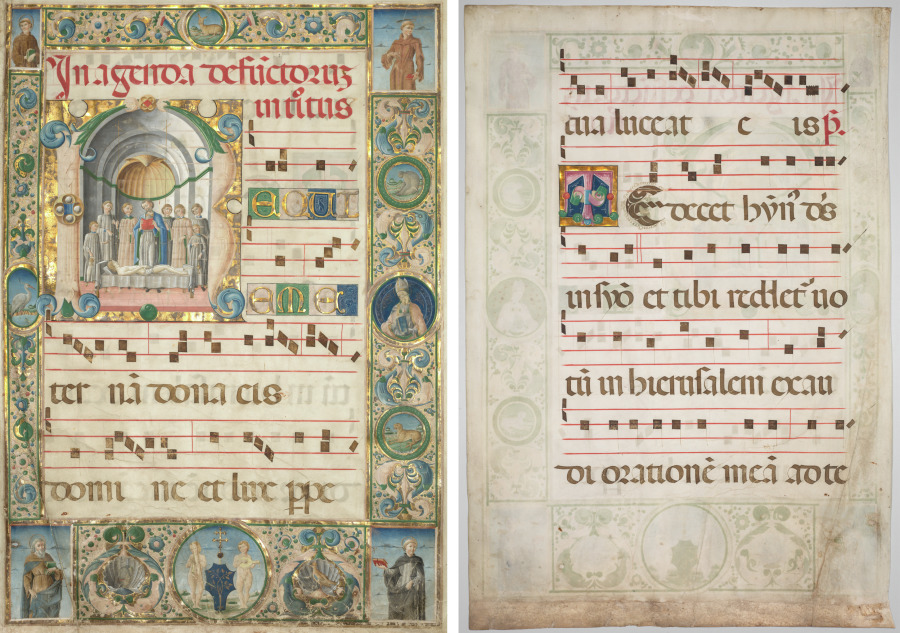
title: Leaf from a Gradual: Initial (R) with Mass for the Dead (recto)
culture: Italy, Ferrara, 15th century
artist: Jacopo Filippo d' Argenta (Italian, 1501)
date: c. 1480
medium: ink, tempera, and gold on parchment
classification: Manuscript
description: This leaf was excised from a volume of a large set of choral books known to have been commissioned by Bartolomeo delle Rovere for Ferrara Cathedral. Delle Rovere, nephew of Pope Sixtus IV, was the Bishop of Ferrara from 1474 to 1494 and his arms appear in the rondel at the bottom of the page: a shield bearing an oak tree (rovere in Italian) surmounted by a patriarchal cross, the symbol of his rank and authority. Payment records indicate that Argenta worked on the choir books for Ferrara Cathedral from 1478 to 1486. The large historiated initial R dominates the extensive decoration including a realistically painted scene in which a priest (center) surrounded by acolytes stands over the body of the deceased as he reads the Office of the Dead. The ceremony takes place within a vaulted chapel that recedes in space to create the illusion of perspective.